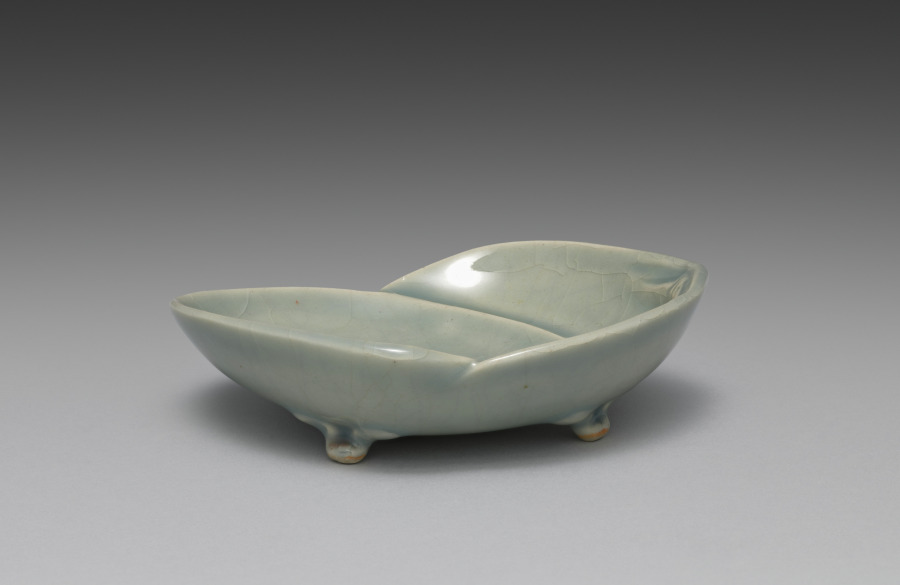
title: Dish from Saucers with Matching Shells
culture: Japan, Meiji period (1868–1912)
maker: Seifū Yohei III (Japanese, 1851–1914)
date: 1893–1914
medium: Porcelain with molded design and green crackled glaze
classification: Ceramic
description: Yohei III’s main output for his sophisticated clientele was in the form of tea sets and dining sets. He created a range of dishes in green glazes. He often produced in pairs, sets of five, or sets of ten. The set of five dishes with a more complex form is described as having a “water-colored glaze” (mizuiroyū). These are shaped like clam half shells, a reference to a game in which shell halves painted with narrative scenes or a variety of motifs must be matched back together by the players. The dishes have molded details to articulate the shell forms, and the crackling across each shell adds another dimension to the surface. Each dish is set on three small feet, formed by a pinched piece of clay and attached to an unglazed area on the underside of the dish. Curiously, while four of the dishes are stamped with the artist’s mark, one has instead a signature carved into the base.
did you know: Each of the paired-shell dishes has its own compartment in a long, flat box.